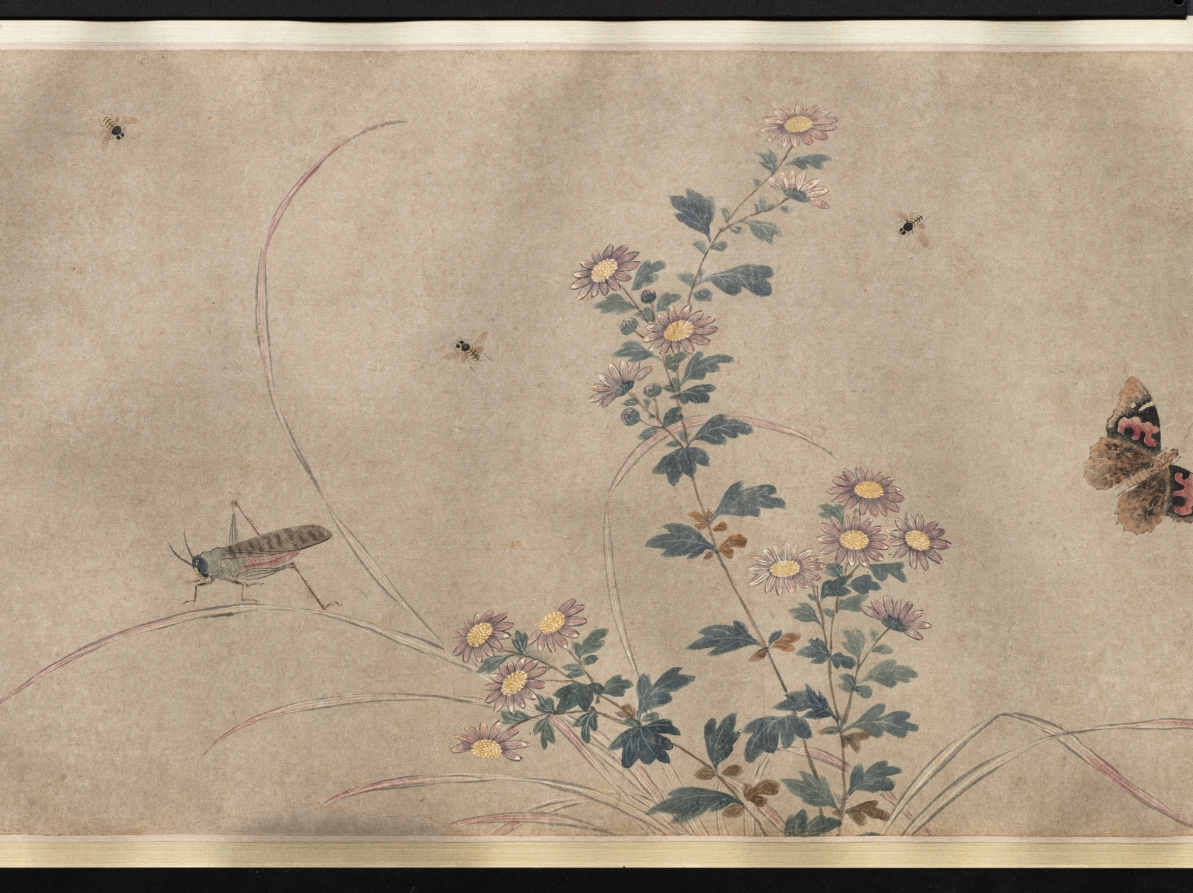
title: Insects and Flowers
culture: China, Qing dynasty (1644-1911) or Republican period (1912-49)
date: c. 1900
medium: Handscroll, ink and color on paper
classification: Painting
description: More than 26 feet long, this scroll presents insects, reptiles, and plants in delicate brushwork and pale colors, referring in style to earlier Southern Song dynasty (1127–1279) bird-and-flower paintings. Upon closer inspection, ants dismember a butterfly and reptiles wait to ambush their prey. An inscription at the end of the painting gives us an idea of its meaning: Attributed to the Qing dynasty scholar Zhang Xigeng (張錫庚, 1801–1861), the inscriber relates the work to an earlier painting by Qian Xuan (錢選, c. 1235–before 1307) and further suggests that the painting may allude to the relentlessness of natural selection. By drawing a parallel to tumultuous episodes in Chinese history, the writer might even hint at the domestic rebellions and the aggression of Western powers against China in his lifetime, particularly the Opium Wars (1839–60).